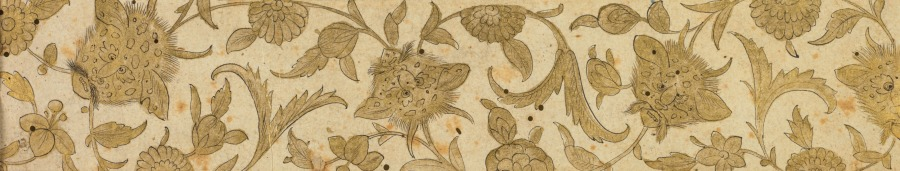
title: An Illuminated Folio from the Royal Manuscript of the Farhang-i Jahangiri (recto)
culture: Mughal India, court of Jahangir (1605–1627)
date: 1607–8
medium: Gum tempera, ink, and gold on paper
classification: Painting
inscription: Recto: “kuyesteh” (misspelling of “kunisteh,” meaning two halves of the buttocks) to “Gur” (name of a people in India)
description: Farhang-E Jahāngīrī, one of the most complete and authoritative dictionaries of the Persian language, was compiled by Mir Jamal al-Din Husayn Inju. It took him twelve years to compile over 9,000 words with definitions and examples from verses by Persian poets. He was born in Shiraz, Iran, but lived most of his life in Agra, India, so the dictionary was named honor of the Mughal emperor Jahangir, who reigned from 1605 to 1627.